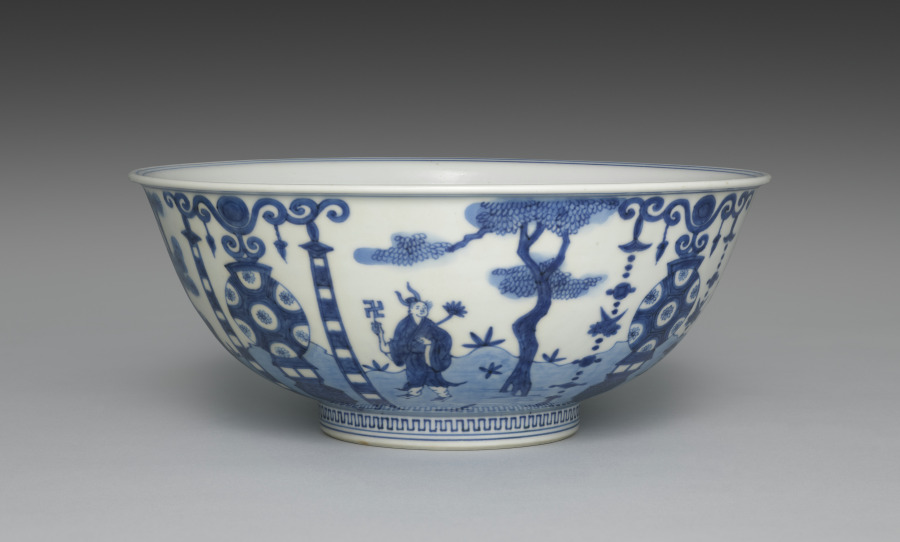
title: Bowl from Nesting Bowls with Daoist Immortals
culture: Japan, Meiji period (1868–1912)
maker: Seifū Yohei III (Japanese, 1851–1914)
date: 1893–1914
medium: Outer bowl from a set of three bowls; porcelain with underglaze blue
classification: Ceramic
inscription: 清風与平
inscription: 大日本清風造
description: Yohei III was capable of ink painting–like compositions in underglaze blue, as well as more decorative ones like that on this set of three nesting bowls. Bowls with very similar designs in five colors were produced in the reign of the Wanli emperor (r. 1572–1620) during the Ming dynasty, and Yohei must have had direct access to one of these or to a close copy. A scene of Daoist immortals is presented on the bowls. On each one, the ground plane is defined with a blue wash. Four lanterns are evenly spaced around the bowl. Two are flanked with linked-piece metalwork banners of the seven treasures. The alternate altars are adorned with textile banners. In between them are four immortals, each standing beneath a tree with small plants surrounding his feet. Two of the immortals hold fruit on a tray. Another carries an elixir-filled ewer and a willow branch. The fourth holds a swastika (manji), here an auspicious symbol, and a flower. Curiously, the inscription inside each footring reads “Made by Seifu of Great Japan,” in emulation of the dynasty and reign inscriptions that appear on Chinese ceramics; however, one can also see through the translucent glaze another inscription, “Seifu Yohei,” written in large characters within a double band of blue on the largest bowl.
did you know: In the bottom of each bowl is a scene of two robed immortals who appear to stand on a precipice in a mountainous landscape high in the clouds, with celestial orbs over their heads.